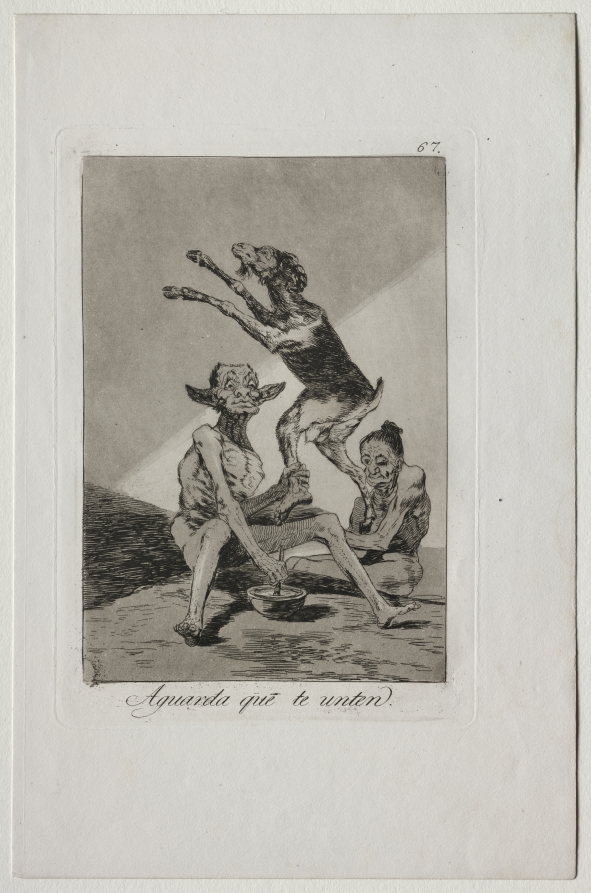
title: Wait Till You've Been Anointed, Plate 67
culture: Spain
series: Los Caprichos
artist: Francisco de Goya (Spanish, 1746–1828)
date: 1799, printed c. 1855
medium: etching and aquatint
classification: Print